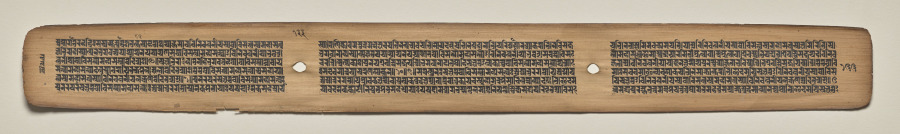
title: Text, Folio 133 (verso), from a Manuscript of the Perfection of Wisdom in Eight Thousand Lines (Ashtasahasrika Prajnaparamita-sutra)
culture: Eastern India, Bihar, Vikramashila Monastery. Painting: Nepal, Kathmandu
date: Sunday, September 14, 1119 (year 239 of the Newar Samvat in the month of Ashvina)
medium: gum tempera and ink on palm leaves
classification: Painting